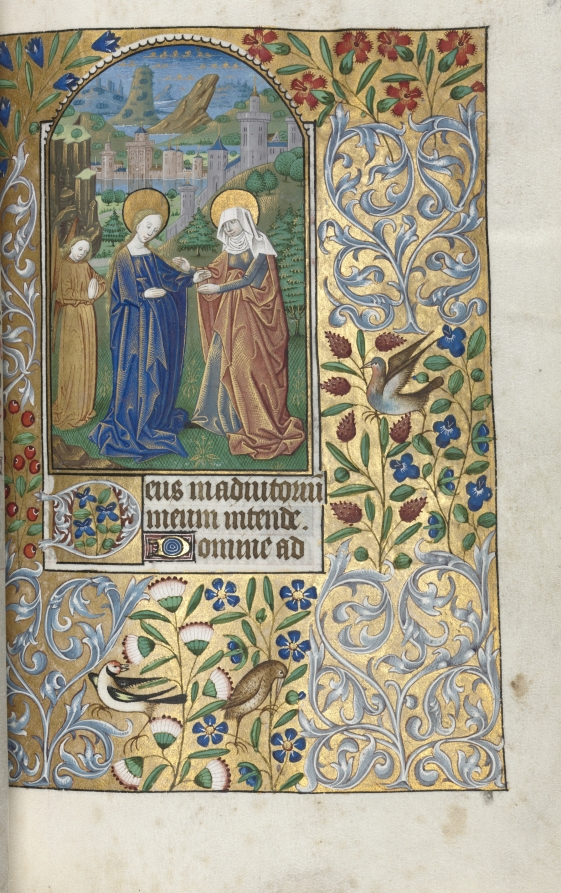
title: Book of Hours (Use of Rouen): fol. 39r, The Visitation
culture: France, Rouen, 15th century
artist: Master of the Geneva Latini (French, active Rouen, 1460–80)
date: c. 1470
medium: ink, tempera, and gold on vellum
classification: Bound Volume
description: In the late 1400s and early 1500s Rouen was an established and important center of book production. The city’s cathedral had a wealthy chapter that spent large sums of money to commission books and to maintain its extensive library. The stationers and booksellers would have likely been concentrated in or near the cathedral precinct. This artist, named after a manuscript now in Geneva, was Rouen’s principal illuminator during the second half of the 1400s.